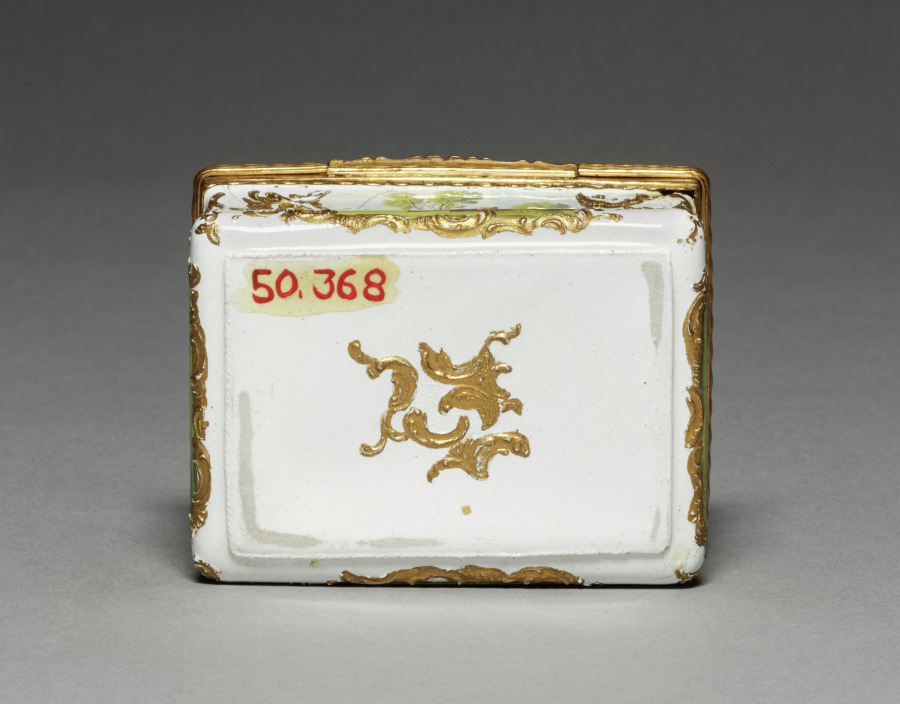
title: Box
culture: England, 18th century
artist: South Staffordshire Factory (British)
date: 1760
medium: enamel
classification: Enamel